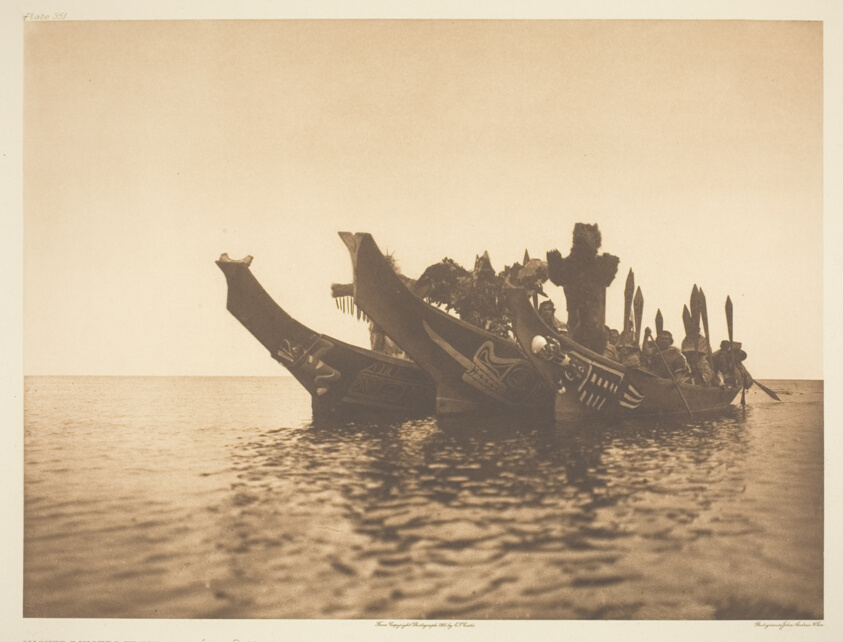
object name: Photograph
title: Masked Dancers in Canoes-Qagyuhl A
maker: Edward S. Curtis (American, 1868–1952)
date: 1914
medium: Photogravure, plate 351 from "The North American Indian, Volume 10" (1915)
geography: United States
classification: photogravure; photomechanical process; photography; photograph